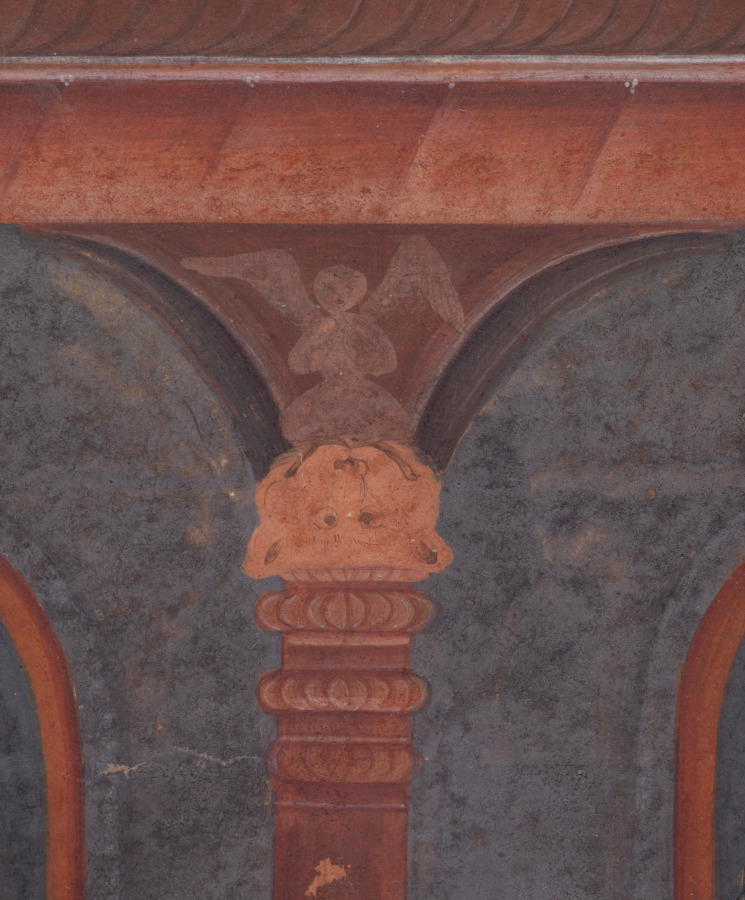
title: Salome Receiving John the Baptist’s Head on a Platter (folio 112 verso), from a Mirror of Holiness (Mir’at al-quds) of Father Jerome Xavier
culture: Mughal India, Allahabad, made for Prince Salim (1569–1627)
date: 1602–4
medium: Gum tempera, ink, color, and gold on paper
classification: Manuscript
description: Herod, King of Judea, sits on a Mughal-style throne as his wife’s daughter Salome reaches for the freshly severed head of John the Baptist. John had offended Herod’s wife, so she took revenge by having her daughter seduce Herod into granting her this wish. Salome is depicted modestly in this painting, and the court musician at the lower left looks on in disgust. The lion head capitals on the pillars above Herod are upside down, seemingly in disapproval of the debauched king.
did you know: Column capitals in Herod’s palace have angels seated on upside-down lion heads.